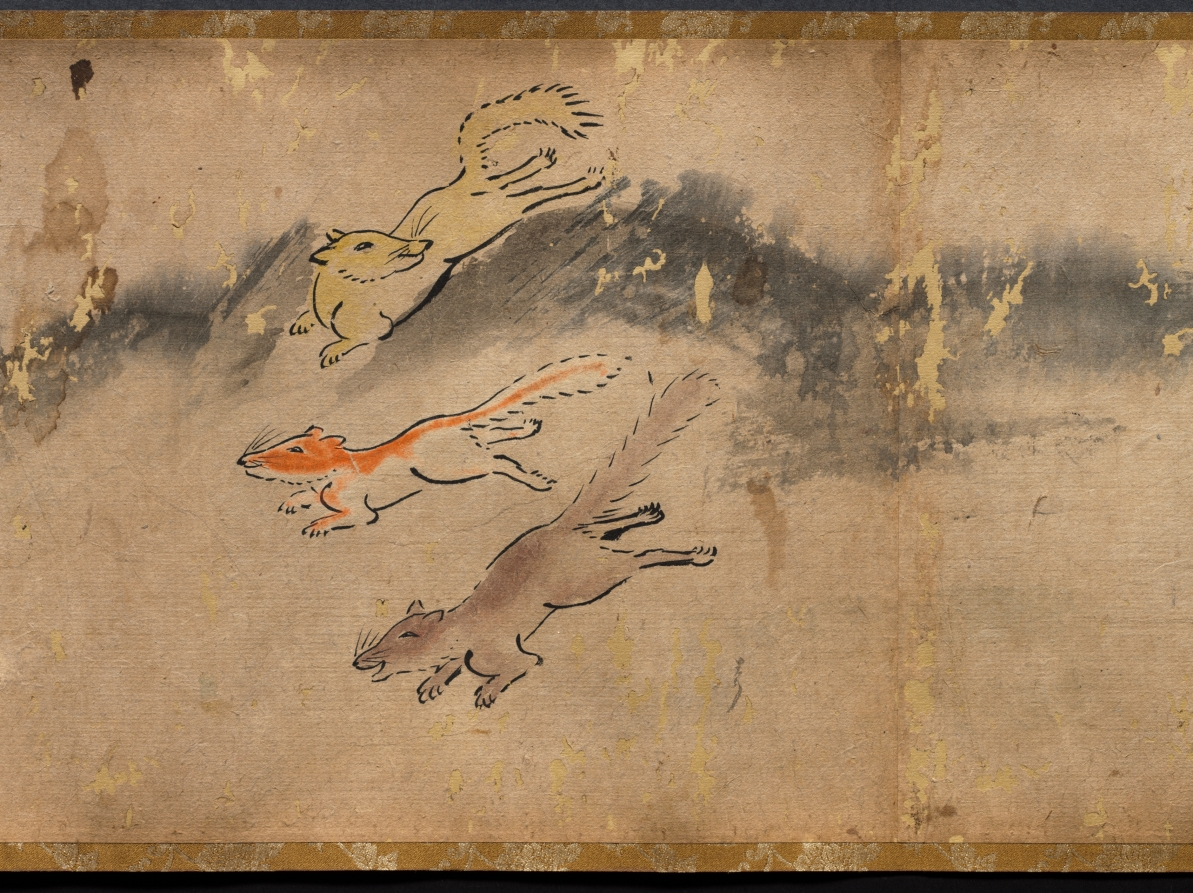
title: The Illustrated Tale of Oishi Hyōroku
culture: Japan, Edo period (1615–1868)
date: 1700s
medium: handscroll; ink and color on paper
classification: Painting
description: This incomplete handscroll illustrates part of the story of Oishi Hyoroku, a young man tasked with battling fox apparitions who were creating problems in his town. In other extant versions of the scroll, the story is set in the fall of 1624 in Kagoshima in southern Japan. Throughout the story, Hyoroku is tricked and terrified by the foxes that shift their shapes into a variety of monstrous phantoms. After repeated humiliations, he eventually captures two of the foxes. In this version, colloquial texts that function like text blurbs in comics appear throughout the scroll, but the main text is missing.